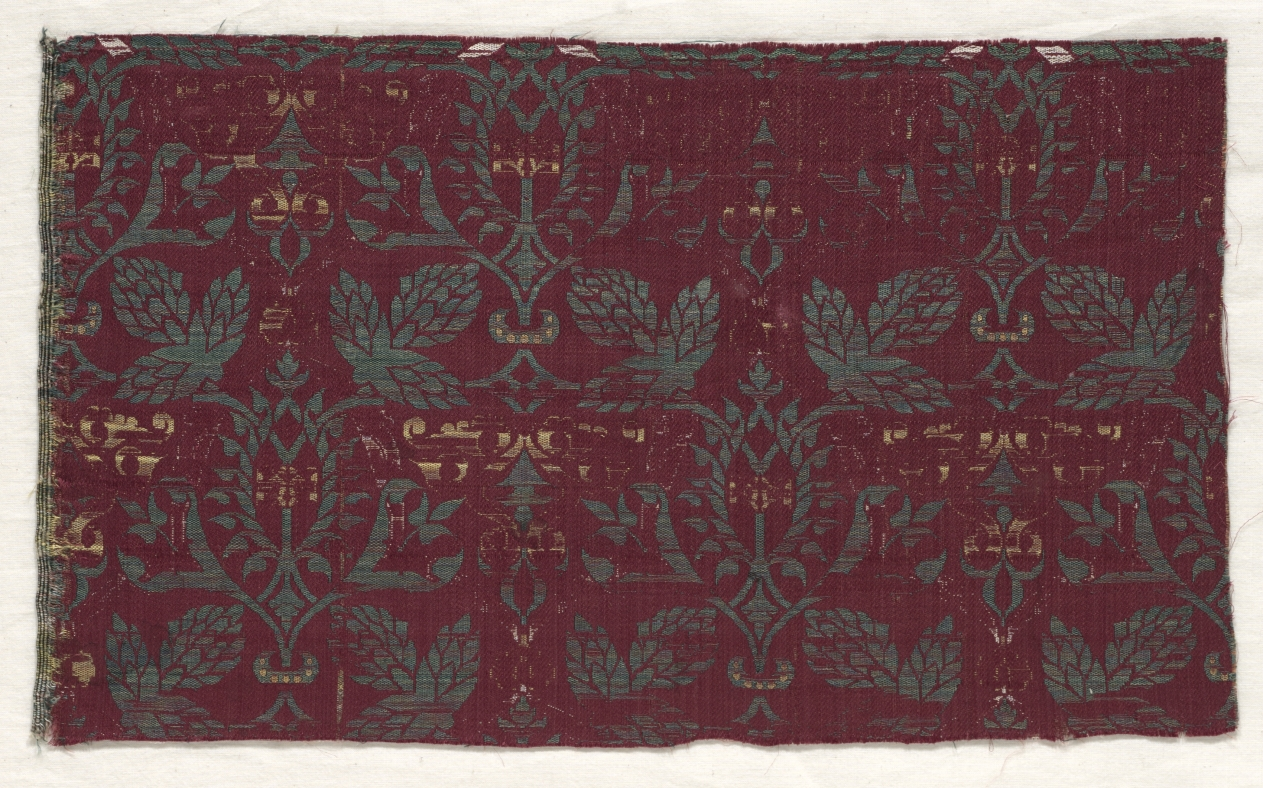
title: Silk Fragment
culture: Spain, Mudejar, 15th century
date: 15th century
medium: lampas weave, silk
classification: Textile